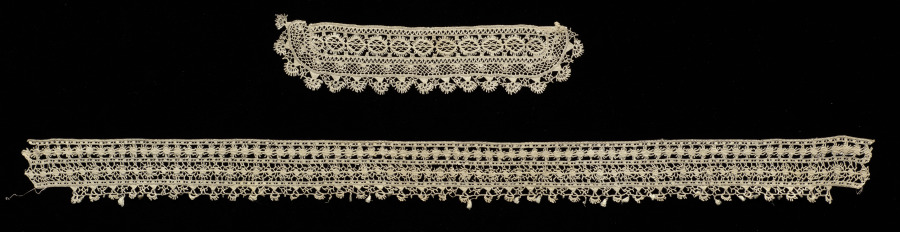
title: Lace Collar and Cuff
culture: Italy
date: 1600s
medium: Knotted lace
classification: Lace